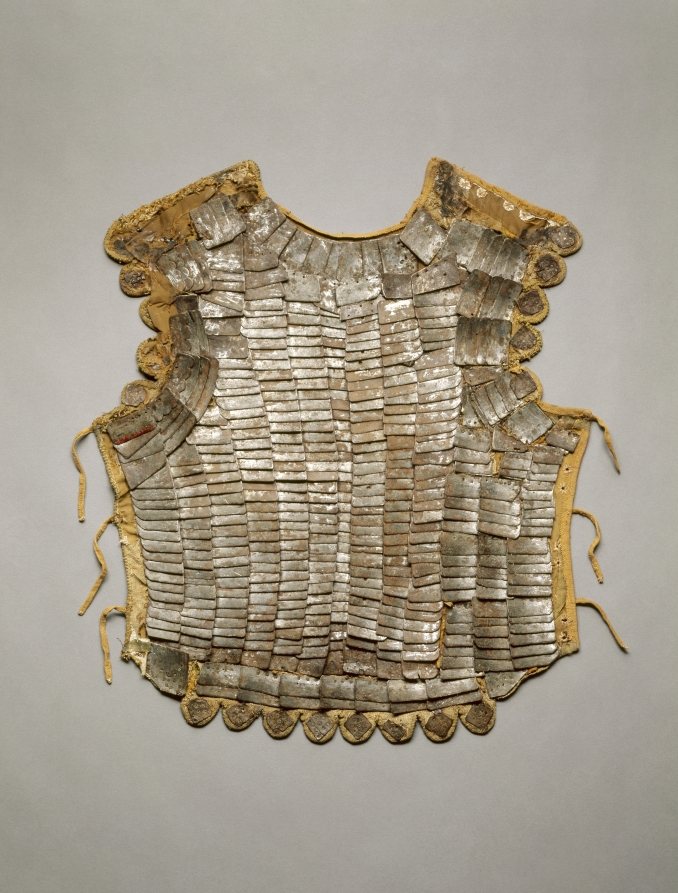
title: Body Guard (Brigandine)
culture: Italy (?), early 16th Century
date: c. 1500–1525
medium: linen; gold velvet; steel; brass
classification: Arms and Armor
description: The brigandine is a light, vest-like body defense popular with both knights and infantry from the 1400s through about 1550. It is constructed of multiple small plates attached to a cloth covering. Finer examples, like this one, are faced in velvet or fabric made of gold thread. The lightweight brigandine provided protection from the weather, and was extremely flexible.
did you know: This vest only weighs about five and a half pounds, considerably lighter than plate armor.